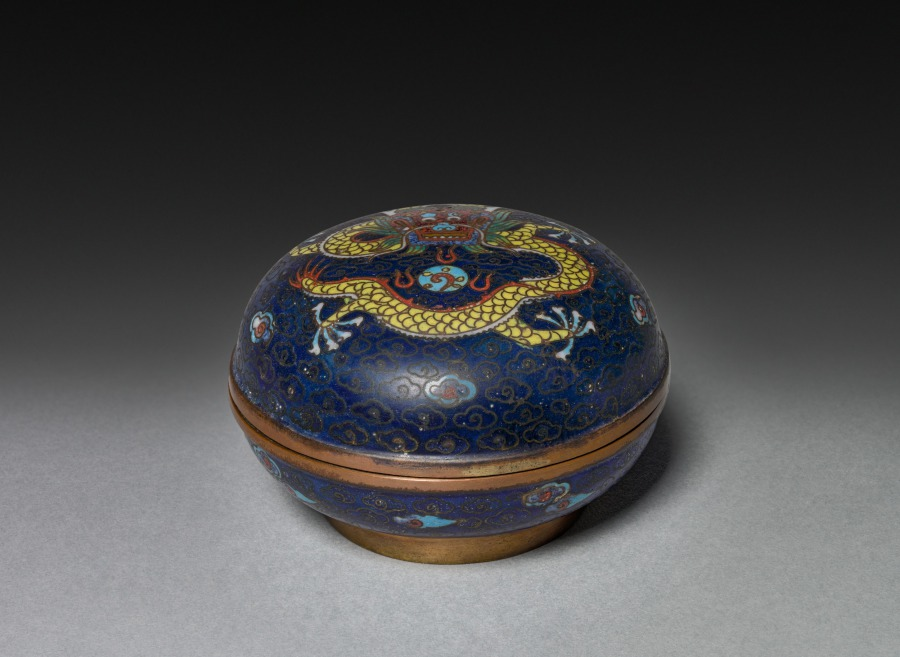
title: Box with Dragon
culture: Japan, Meiji period (1868–1912) or Taishō period (1912–26)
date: c 1900– 1925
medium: cloisonne enamel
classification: Enamel